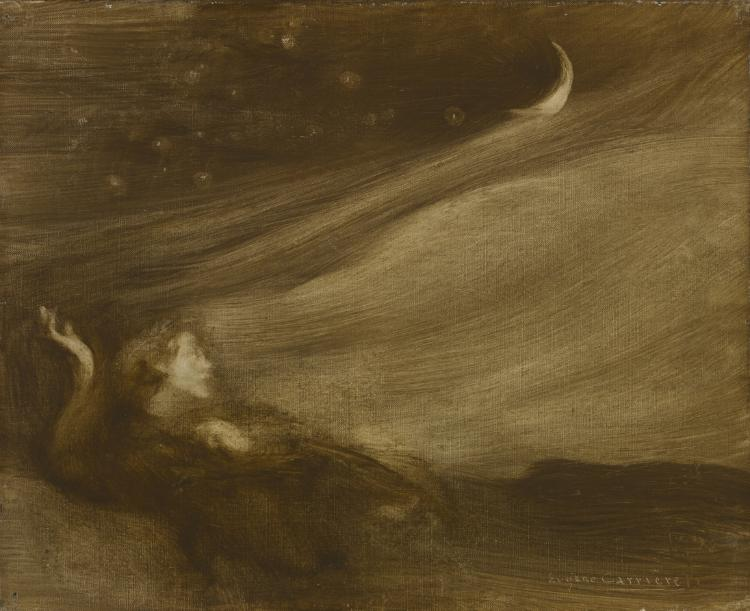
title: The Contemplator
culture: France, late 19th-early 20th Century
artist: Eugène Carrière (French, 1849–1906)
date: 1901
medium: oil on fabric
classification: Painting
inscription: Signed lower right, etched into paint layer, revealing white ground: Eugène Carrière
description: This painting illustrating Victor Hugo's poem Boaz Sleeping is one of five images Carrière created to commemorate the centennial of Hugo's birth. A reclining poet gazes at the stars above, as if in a dream, placing one hand over his heart and gesturing toward a crescent moon. The moon was thought to exert a special influence on poets and artists, inspiring not only creativity but darker thoughts of melancholy and suicide.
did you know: In this painting Carrière captures the atmosphere of Victor Hugo's poems through his expressive brushstrokes and monochromatic palette. The artist's monochrome paintings influenced Picasso and his Blue Period works.